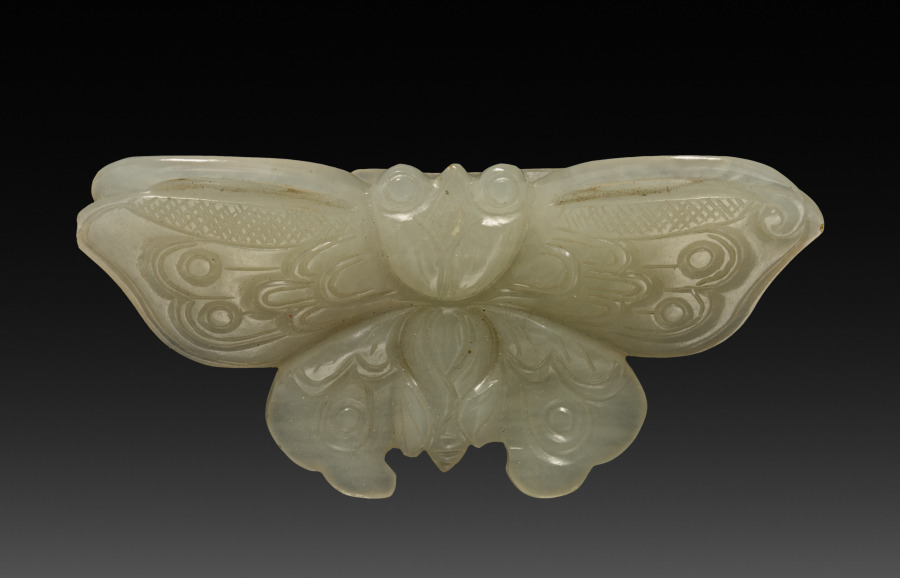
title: Butterfly Pendant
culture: China, Qing dynasty (1644–1911), Qianlong reign (1736–95)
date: 1735–95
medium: jade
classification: Jade